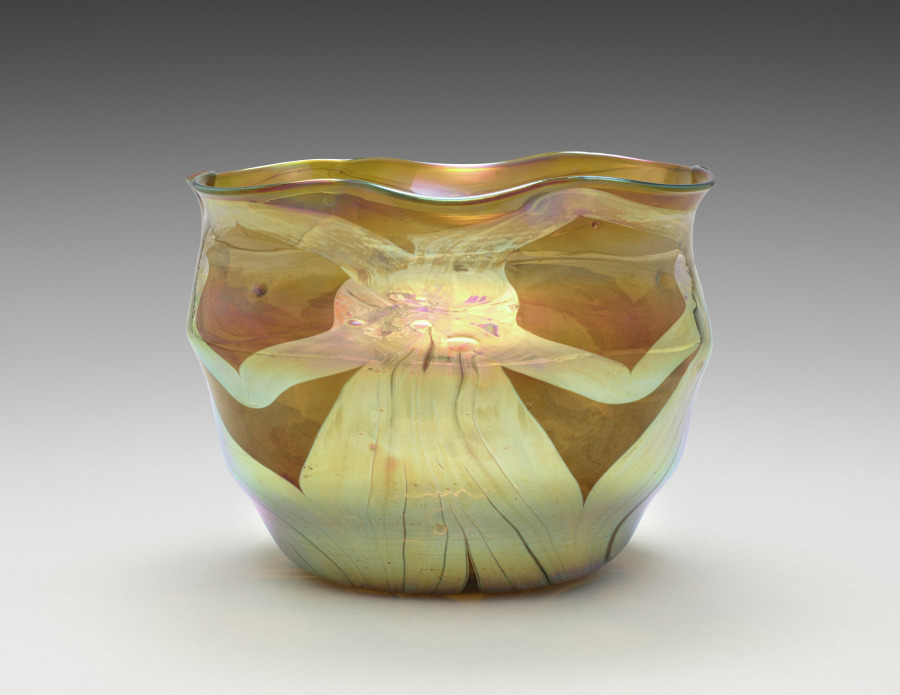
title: Bowl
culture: America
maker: Tiffany Glass & Decorating Company (America, New York, 1892–1902)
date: c. 1896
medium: Favrile glass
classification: Glass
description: Among his many achievements in the decorative arts, Louis Comfort Tiffany invented a type of glass with unprecedented opalescence that he patented under the name Favrile, derived from an Old English word meaning "handcrafted." Tiffany memorably described his Favrile glass as "distinguished by brilliant or deeply toned colors, usually iridescent like the wings of certain American butterflies, the necks of pigeons and peacocks, the wing covers of various beetles."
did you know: Located in Lake View Cemetery in Cleveland, Wade Memorial Chapel features an interior designed by Tiffany.